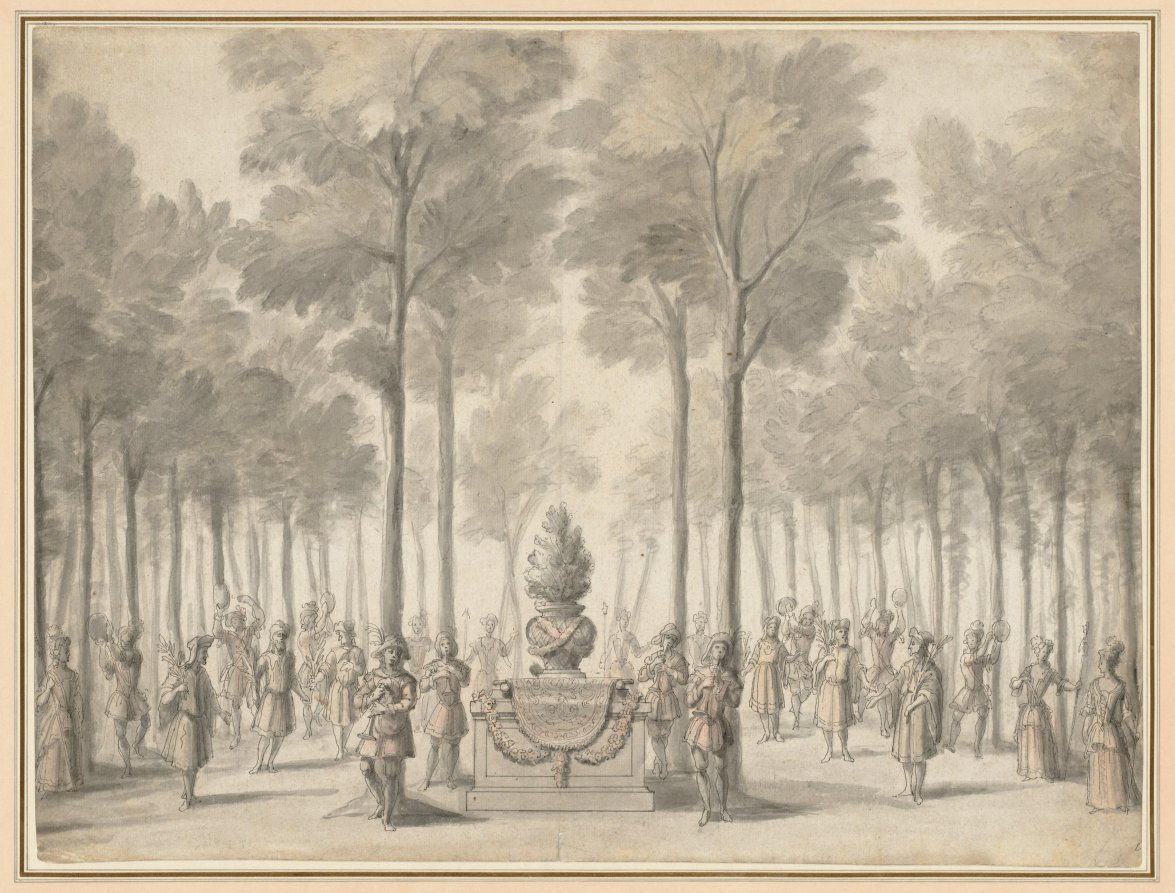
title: Design for the Divertissement from "La Pastorale" (First Entrée of the opera-ballet "Les Muses" by Danchet and Campra")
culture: France, 18th century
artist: Jean I Bérain (French, 1640–1711)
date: 1703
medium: pen and black ink and brush and gray wash with red, blue, and yellow wash, with graphite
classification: Drawing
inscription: lower left, in graphite?: No 23; verso, upper left, in graphite: W; center, in graphite: 1230 [sideways]; lower right, in graphite: Probably Jean Le Pautre / scene [illegible]ment for Louis XIV c. 1670 / The V + A might be able to track it down exactly; lower right, in graphite: clean? / surface / clean? / c / [4 w?] / pretty; lower right, in graphite: xb [crossed out]; x336188.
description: This drawing represents the elaborate stage set for the opera-ballet Les Muses that premiered in 1703 at the Opéra, the most prestigious public theater in Paris. In a city that thrived on spectacle, the opera-ballet was one of the most fashionable forms of entertainment in the 18th century. Berain’s drawing relates to the third scene in the first of four acts, "La Pastorale," in which shepherds and shepherdesses pay homage to deities in a wooded grove. The celebration, accompanied by flutes and a musette (small bagpipe) comprised a lighthearted musical interlude or divertissement, an indispensable component of the opera-ballet.